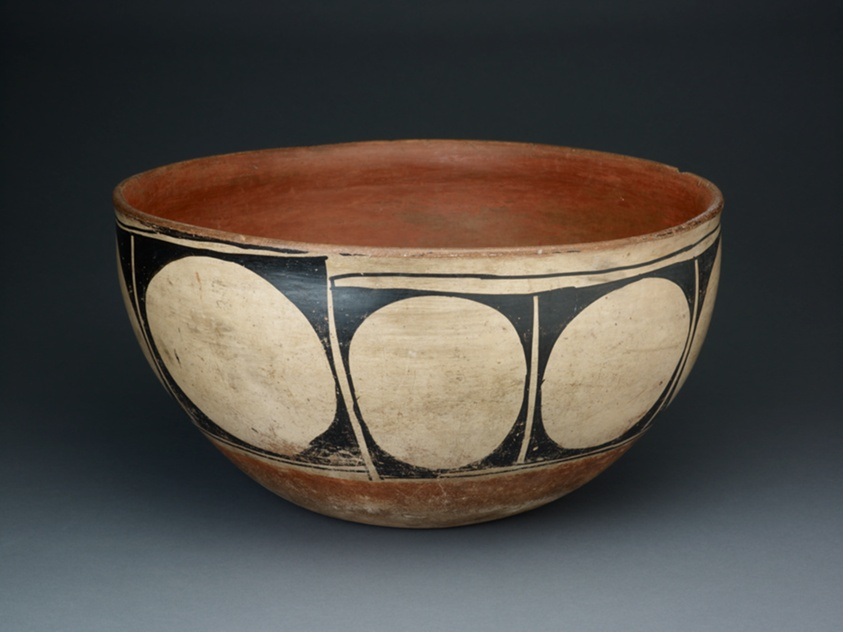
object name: Vessel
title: Polychrome Bowl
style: santo domingo, southwest, pueblo, kiua, americas, native american, native north american, Arts of the Americas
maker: Santo Domingo, Kiua polychrome; Santo Domingo Pueblo, New Mexico, United States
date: 1880–1900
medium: Ceramic and pigment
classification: bowl; ceramics; vessel; art of the americas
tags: storage, circles, geometric, servingware